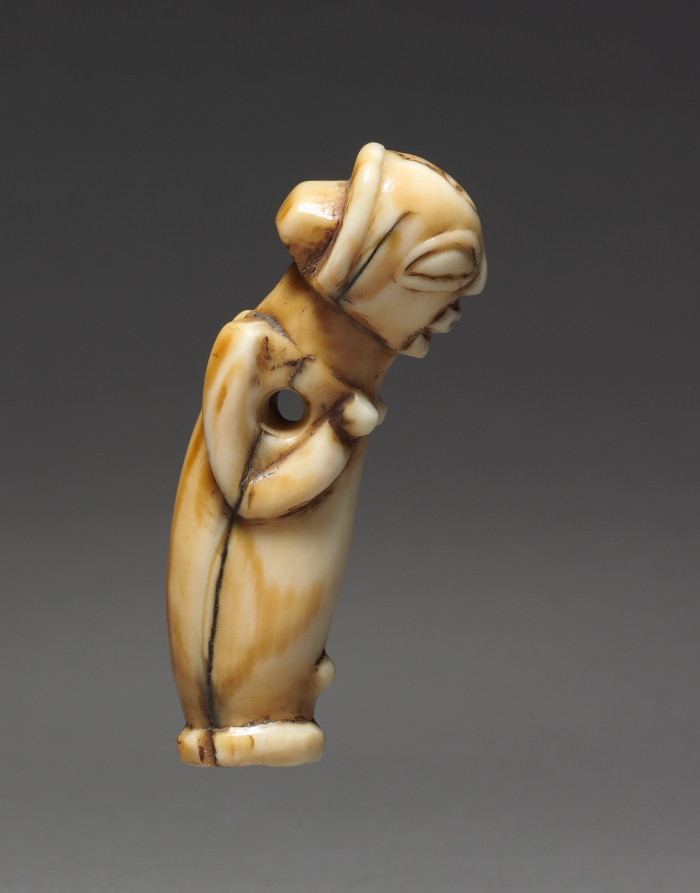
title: Pendant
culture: Africa, Central Africa, Democratic Republic of Congo, Luba-style maker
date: late 1800s–early 1900s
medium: Ivory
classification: Jewelry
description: Luba pendants made in ivory or bone were originally suspended on a cord and worn diagonally across the chest of a high-ranking member of society. Often accompanied by amulets, beads, or small antelope horns, they represented ancestral spirits and served as portals to ancestral wisdom and beneficence. Many of these diminutive figurines hold their hands to their breasts as a sign of the secrets and wisdom they contain.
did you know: The caramel-colored patina of the ivory indicates the frequent usage of the pendant.